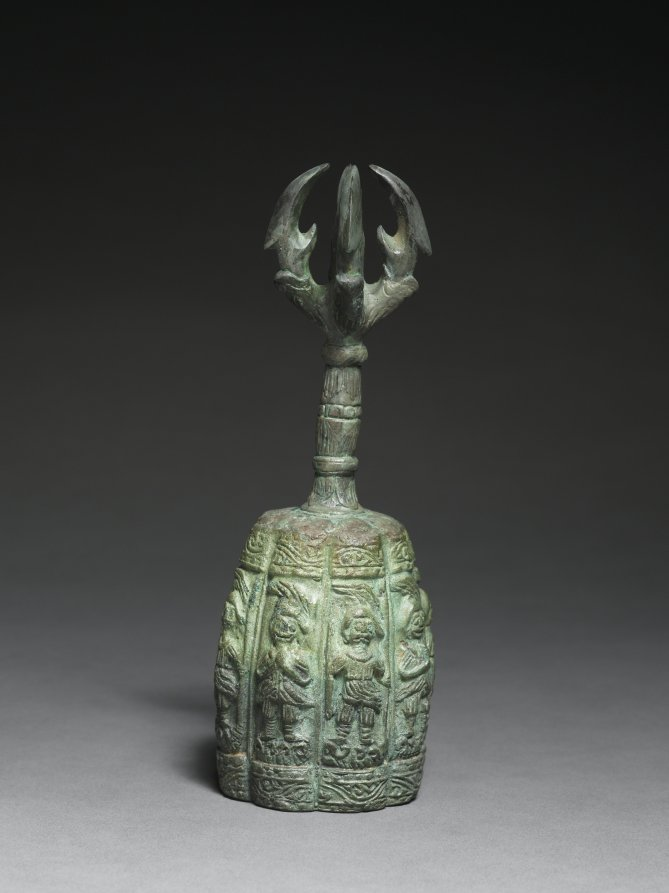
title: Buddhist Ritual Bell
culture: Korea, Goryeo dynasty (918–1392)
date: 1300s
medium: bronze; with incised designs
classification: Metalwork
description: This Buddhist ritual bell is called the "five-pronged" bell due to the four prongs bending toward a central prong at the end of the handle. This shape is a vajra, or lightning bolt, a powerful and important symbol in esoteric Buddhism, which originated in India, spread across Asia, and was practiced in Korea.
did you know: Called a vajra in Sanskrit, this implement is used in Buddhist rituals meant to destroy ignorance.